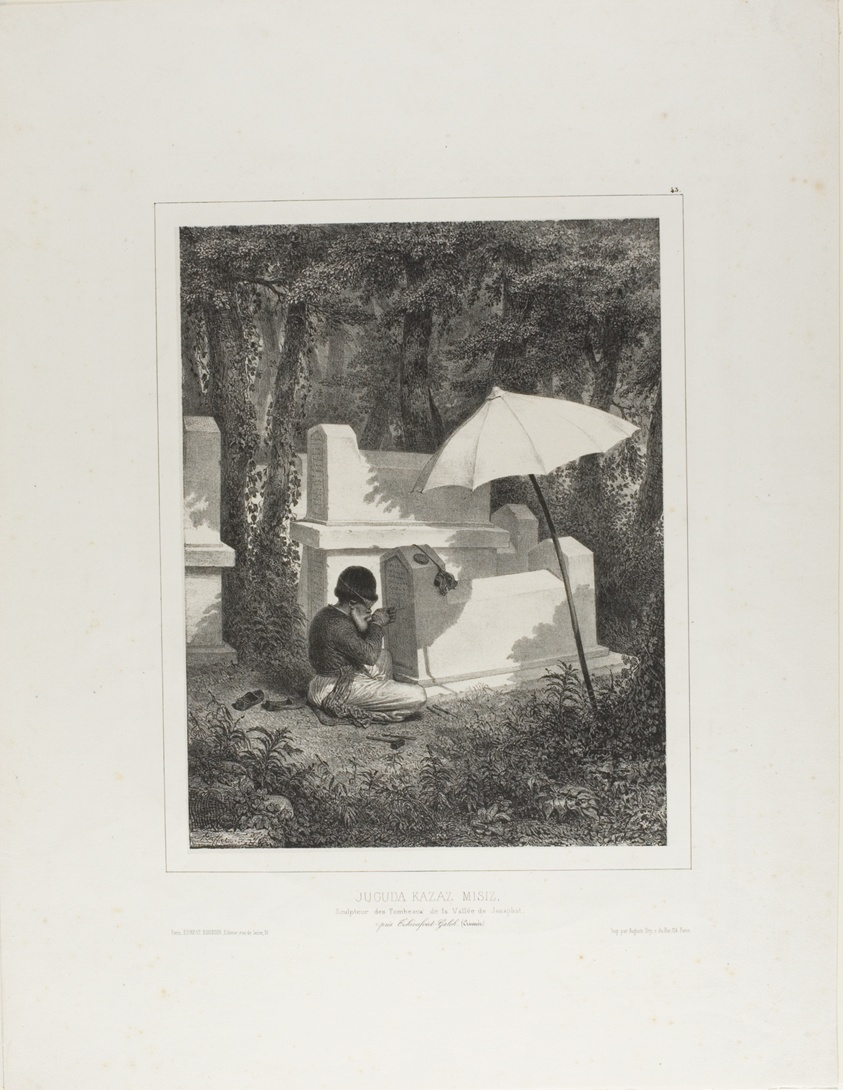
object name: Print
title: Portrait of Juguda Kazaz, Misiz, at Work as a Tomb Sculptor in the Josaphat Valley, Near Tchioufout-Galeh, Crimea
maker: Denis Auguste Marie Raffet (French, 1804-1860); printed by Auguste Bry (French, 19th century); published by Éditeur Ernest Bourdin (French, active 19th century)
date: 1837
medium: Lithograph in black on gray wove chine laid down on ivory wove paper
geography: France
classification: lithograph; print; prints and drawing